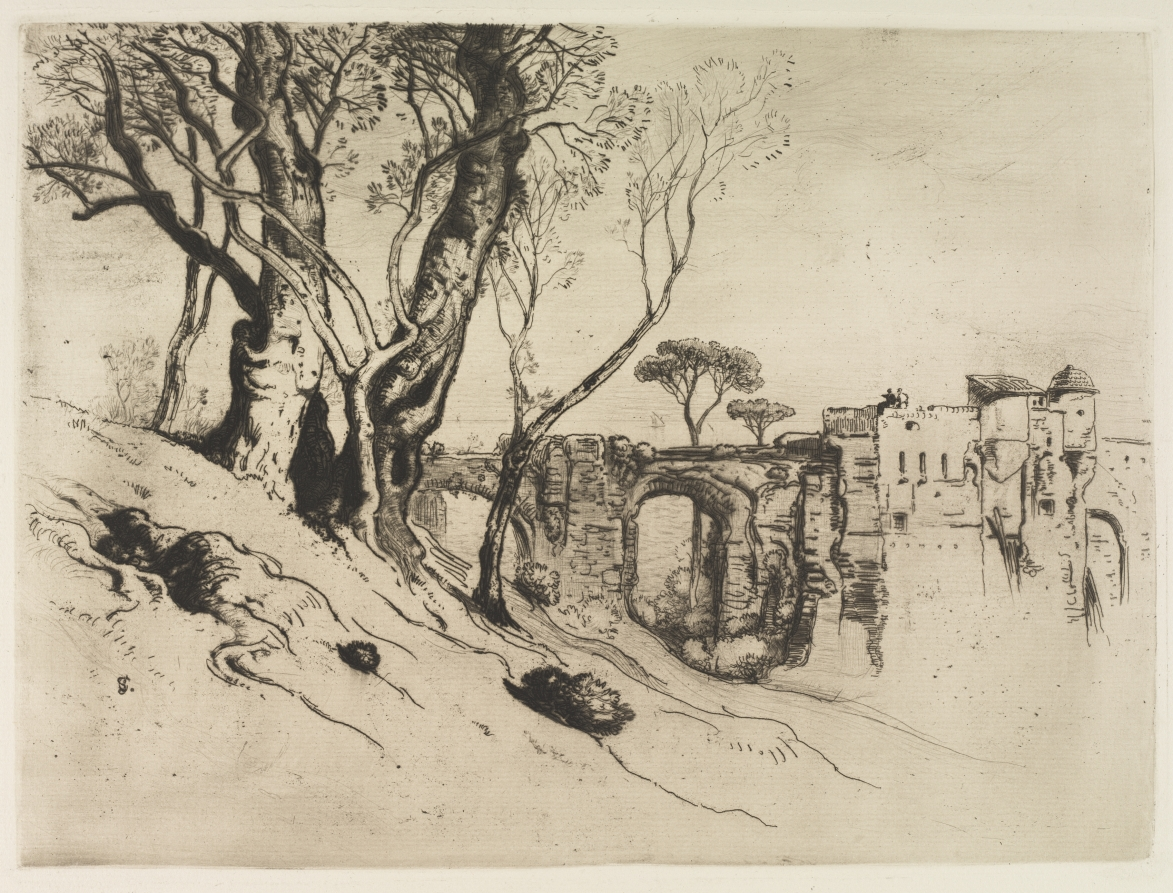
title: Olive Trees of the Riviera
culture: America, late 19th-early 20th century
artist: Samuel Colman (American, 1832–1920)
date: c. 1875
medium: etching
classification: Print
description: Like Otto Bacher and Joseph Pennell (both also in thisexhibition), Colman was an avid traveler and madeextensive European tours in 1860 and 1871. He recordedhis peripatetic life in etchings, watercolors, and paintings.In this landscape and architectural vignette of southern France, Colman described an overgrown aqueduct amongst gnarled olive trees. Two figures gaze toward thepicturesque vision of a sailboat on the sunlit Riviera.